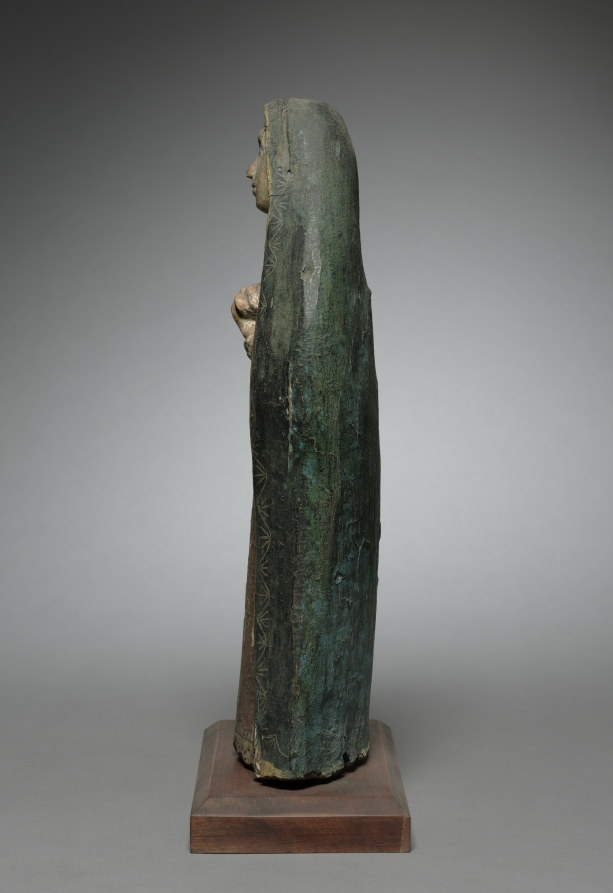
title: Our Lady of Sorrows: santo de bulto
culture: America, New Mexico, 17th-18th century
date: 1600s-1700s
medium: painted wood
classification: Sculpture